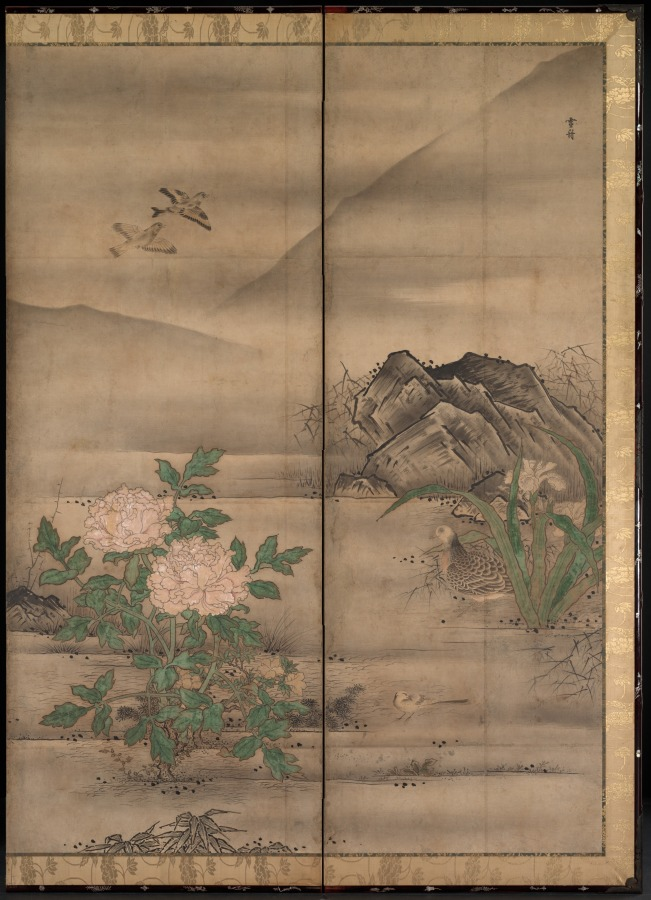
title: Birds and Flowers in a Landscape of the Four Seasons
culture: Japan, Muromachi period (1392–1573)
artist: follower of Sesshū Tōyō (Japanese, 1420–1506)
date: second half of the 1500s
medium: Six-panel folding screen, ink and color on paper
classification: Painting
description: The monk-painter Sesshū is revered today, as he was in his own time. While he left Kyoto's sophisticated intellectual and cultural environment to live in a provincial village in a far western province, he seems never to have severed contacts with the monastic communities of his young adulthood. His residence in Yamaguchi proved fortuitous because his patron, the region's military lord, enjoyed considerable freedom in conducting trade missions overseas with Korea and China. Sesshū went to China in 1467 and traveled about the country, visiting well-known historical sites and Chan (Zen) temples before returning two years later. Thus he became familiar with contemporary painting practices, materials, formats, and subject matter. His assimilation and then transmission of these elements had a profound impact on the following generations of ink painters, patrons, and Zen communities throughout Japan. Despite the presence on these byōbu of the name "Sesshū," they are from the hand of another accomplished but as yet anonymous follower active in the middle of the sixteenth century. Sesshū's name here, as on a handful of similar bird-and-flower byōbu, attests to the master's identification at that time with the colorful mural paintings on the same theme emanating from Ming dynasty China. This genre had heretofore been relegated to hanging scroll compositions, so the intro-duction into temple and daimyo residences of such an attractive theme surely caused considerable excitement in the later fifteenth century, when in all likelihood Sesshū introduced it into the Japanese painting repertoire. Subsequently, artists of varying backgrounds and training tried their hands at these large, dramatic scenes. From right to left the composition portrays an array of flowering plants in the near distance that indicate the passage of the seasons. Birds, usually paired, occupy this setting, engaged in various activities that lend naturalism and an air of peacefulness. The world they inhabit may be characterized pictorially by expansive middle-ground waterscapes that end where the far distant mountains rise as backdrops. These features appear consistently in other bird-and-flower byōbu attributed to Sesshū. Also noteworthy is the absence of any birds of prey such as the samurai's beloved hawks, emblems of fierceness and graceful strength that appear often in the byōbu of sixteenth-century Kano and Soga school painters.